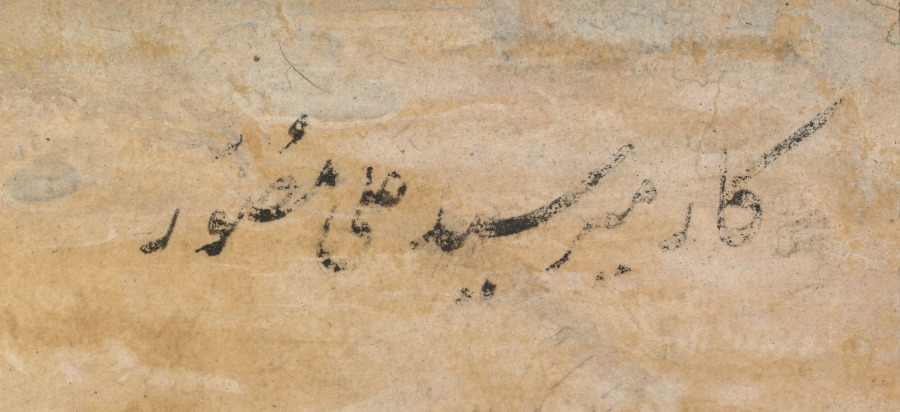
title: Hunting with falcons in a landscape (recto)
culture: Mughal India, court of Akbar (reigned 1556–1605)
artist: attributed to Abd al-Samad (Persian, c. 1510–1600)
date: c. 1558–60; borders added probably 1700s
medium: Gum tempera, ink, and gold on paper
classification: Painting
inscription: Inscription in upper right in nasta‘liq script, probably during the 1700s: the work of Mir Sayyid Ali, the illustrator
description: Mughal princes hunted on horseback with falcons. The hunting party would ride out into the wild and flush the prey from the brush. Then, its hood removed, the falcon would chase the prey and bring it down. This important work is thought to have been painted by one of the Persian artists Akbar’s father brought to India from Iran shortly after his arrival in India. The delicacy of the diminutive figures and the gently modeled rocks of the arid landscape contrast to the boldly dynamic paintings made by Indian artists.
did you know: The hunter’s glove is on the ground, as he pulls his falcon off the duck.